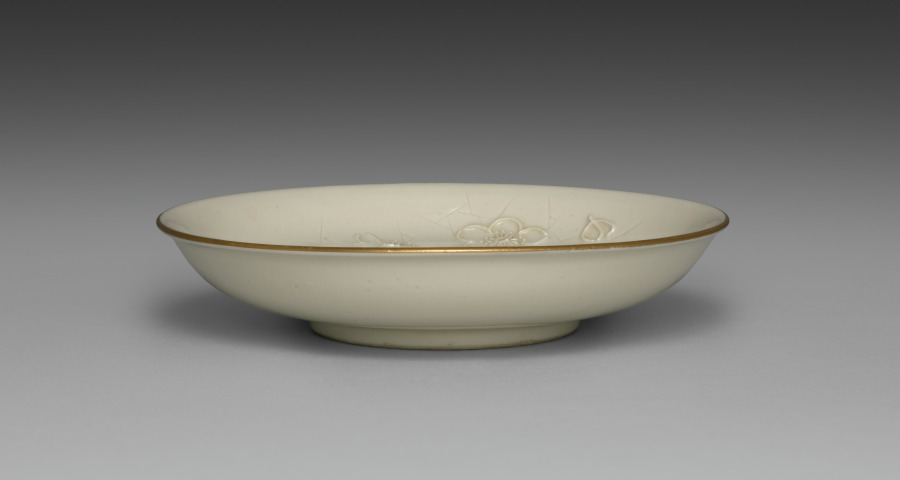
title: Medium-sized Dish from Dining Set with Plum Blossoms and Cracked-Ice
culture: Japan, Meiji period (1868–1912)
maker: Seifū Yohei II (Japanese, 1844–1878)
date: c. 1875–78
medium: Porcelain with molded designs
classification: Ceramic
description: Each item in this set has a delicate low-relief design of flowering plum branches over scattered, intersecting lines meant to resemble the cracked-ice surface of a frozen body of water and is signed on the base in gold pigment. While Yohei II produced many fine works in underglaze blue, like those produced by Kiyomizu Shichibei, he also made works in quite different styles later in his career, from the early 1870 s. In 1873, he was appointed purveyor to the Industrial Center of Kyoto Prefecture, a designation associated with Kyoto’s efforts to reach an international market through the port of Kobe; and from 1875 until his death, he was involved in national-level projects to present Japanese ceramics across the world. It was during this period that Yohei III was apprenticed to Yohei II, and it has been suggested that this set may in fact be an early example of Yohei III’s work, which he signed with his teacher’s name. Decorated with flowers resembling Japanese textile motifs, the set calls to mind the design of Yohei II’s pair of vases with plum blossoms in the Victoria and Albert Museum. Here, the elaborate trees created for a formal public exhibition setting have been translated into the approachable blossoms of the genteel domestic environment. While the designs are consistent across the pieces, each raised flower petal and pistil and each incised line in the ice was done by hand, so the cups, bowls, and dishes are similar yet unique. The bottoms of two boxes once identified the set’s owner, but the information has been deliberately obscured with black ink. However, inscriptions still visible appear to indicate two occasions, once at the end of July 1886 , and once again in June 1916 , when parts of the set were requested from Hokura in Niigata Prefecture. The location corresponds to a neighborhood in the present-day city of Jōetsu. The surname Tsuji 辻 also appears on a paper tag affixed to one of the box cloths. Future research may possibly reveal more about their provenance. A vase by Yohei III in a private collection combines the formal grandeur of the Yohei II vases in the Victoria and Albert Museum with the gentler design of this dining set, placing flowering plum trees against soft, scalloped-edge clouds resembling those in golden screens.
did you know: The dining wares have a creamy white coloration that the four boxes containing them identify as Korean in style.